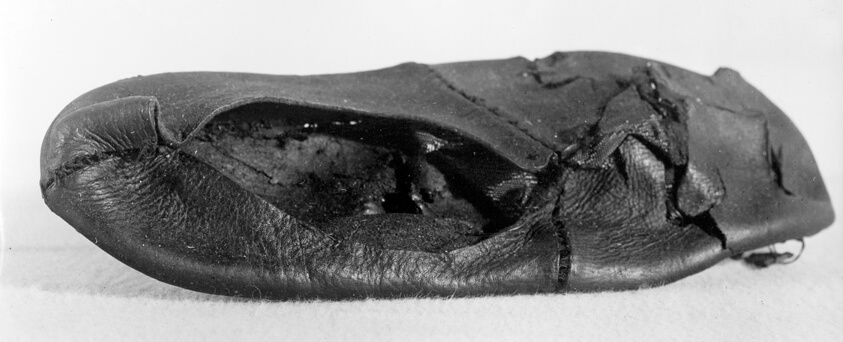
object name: Textile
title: Shoe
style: elizabethan, tudor, european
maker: England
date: 16th century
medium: Leather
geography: England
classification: textile; costume accessory - shoe; shoes - misc; costume; dress (garment); clothing